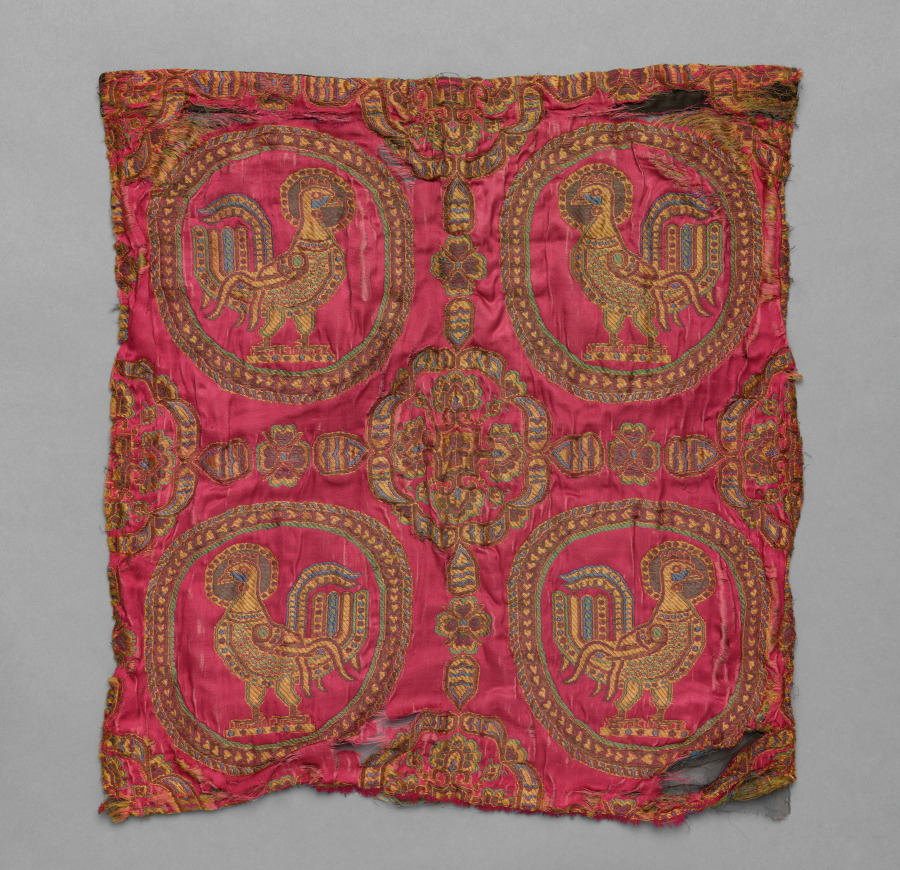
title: Modern Reproduction of Iranian Brocade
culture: Italy, late 19th century-early 20th century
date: late 1800s–before 1923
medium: compound weave, silk(?)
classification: Textile